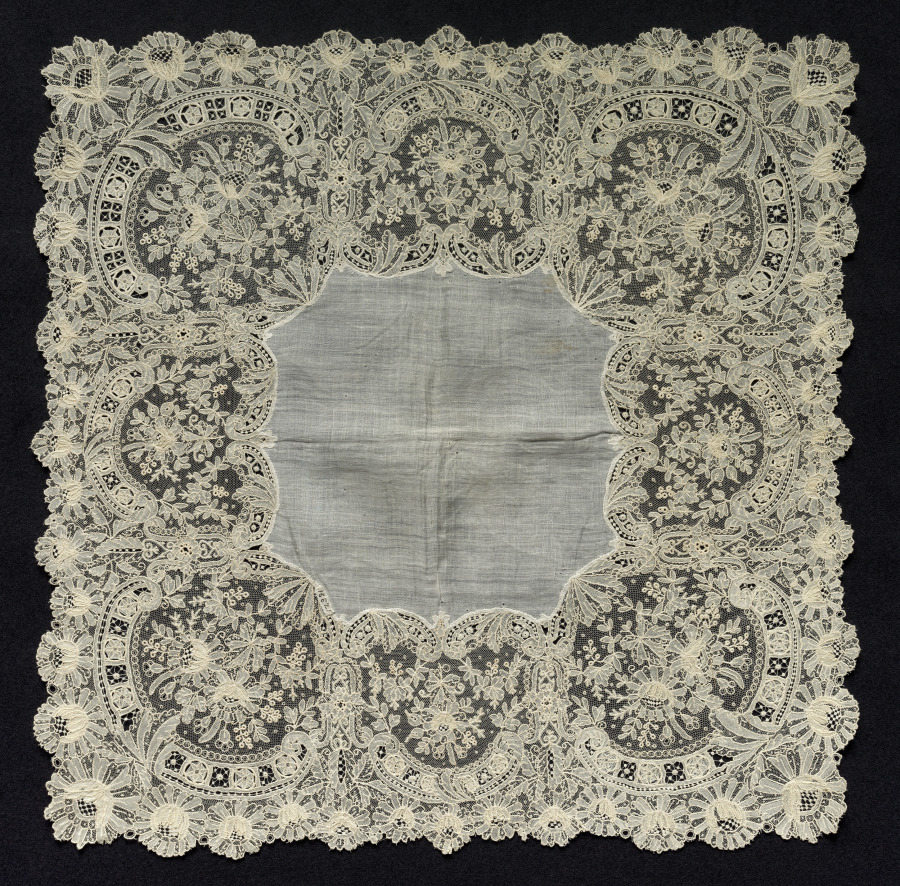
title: Lace Handkerchief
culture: Belgium (Flanders)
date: 1800s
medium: Needle lace (point de gaze)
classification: Lace